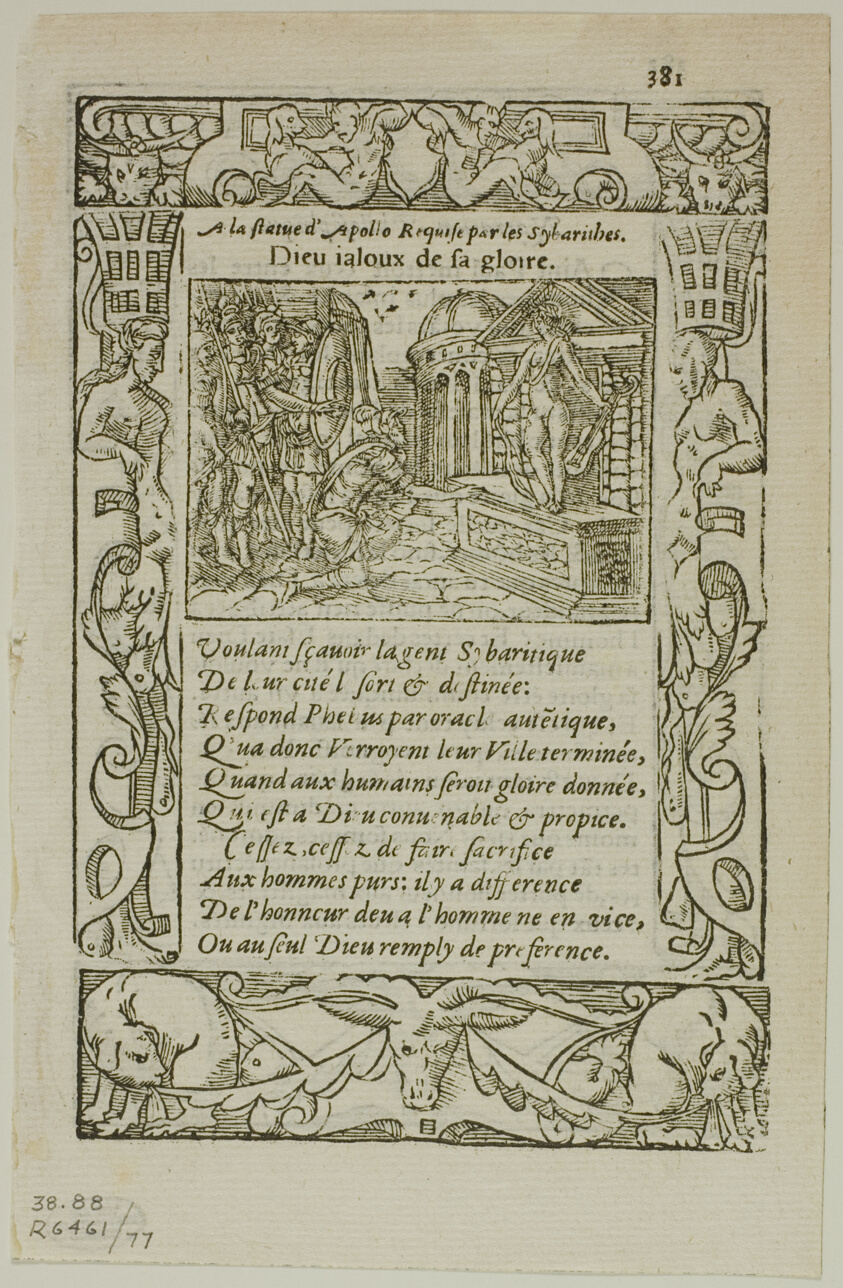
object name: Print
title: Illustration from Le Pegme by Lanteaume de Romieu Cousteau, plate 77 from Woodcuts from Books of the XVI Century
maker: Unknown Artist (French, 16th century); assembled by Max Geisberg (Swiss, 1875-1943)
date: 1560, assembled into portfolio 1937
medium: Woodcut on paper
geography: France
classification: woodcut; print; prints and drawing